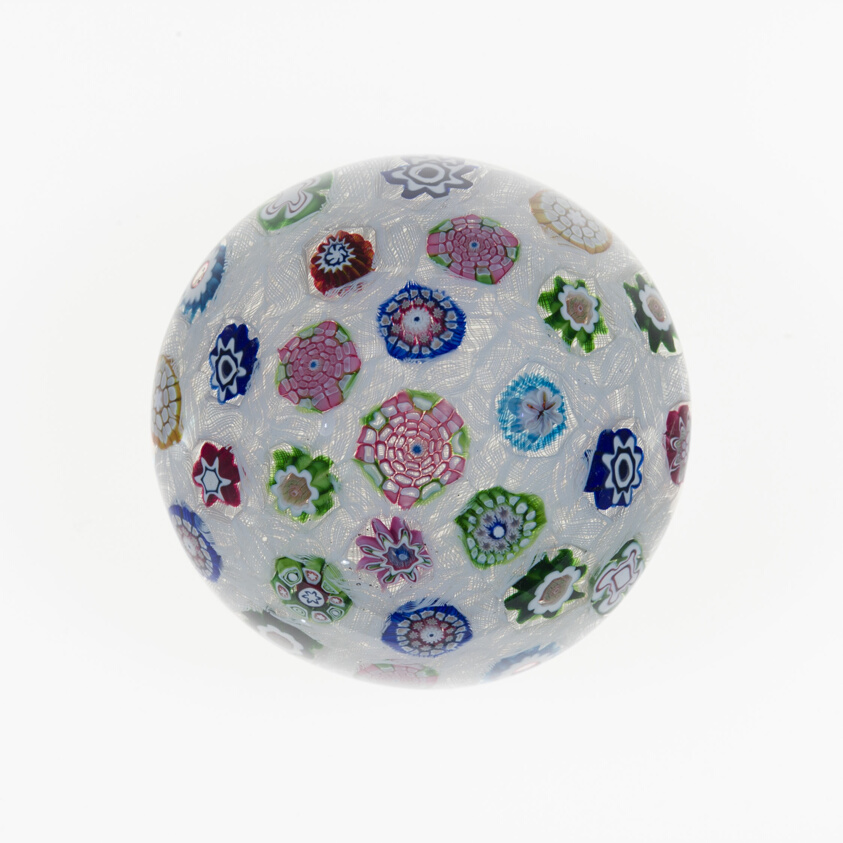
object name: Glass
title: Paperweight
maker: Saint-Louis Glassworks (Cristalleries de Saint-Louis); Lorraine, France, founded 1586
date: c. 1845–60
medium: Glass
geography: Saint-Louis-lès-Bitche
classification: paperweight; glass